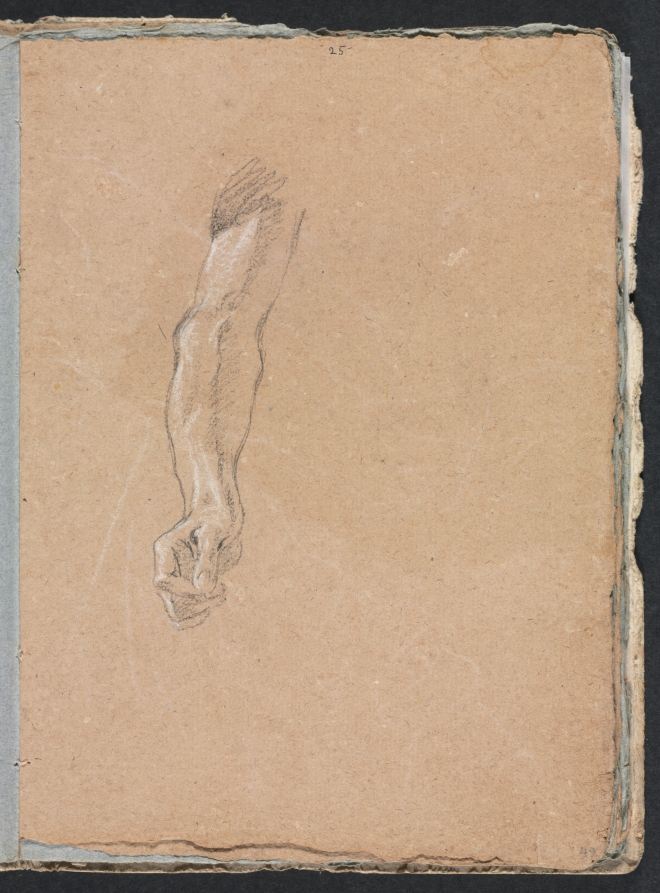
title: Verona Sketchbook: Right arm and hand (page 49)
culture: Italy, 18th century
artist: Francesco Lorenzi (Italian, 1723–1787)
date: 1760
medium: black chalk with white heightening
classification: Bound Volume